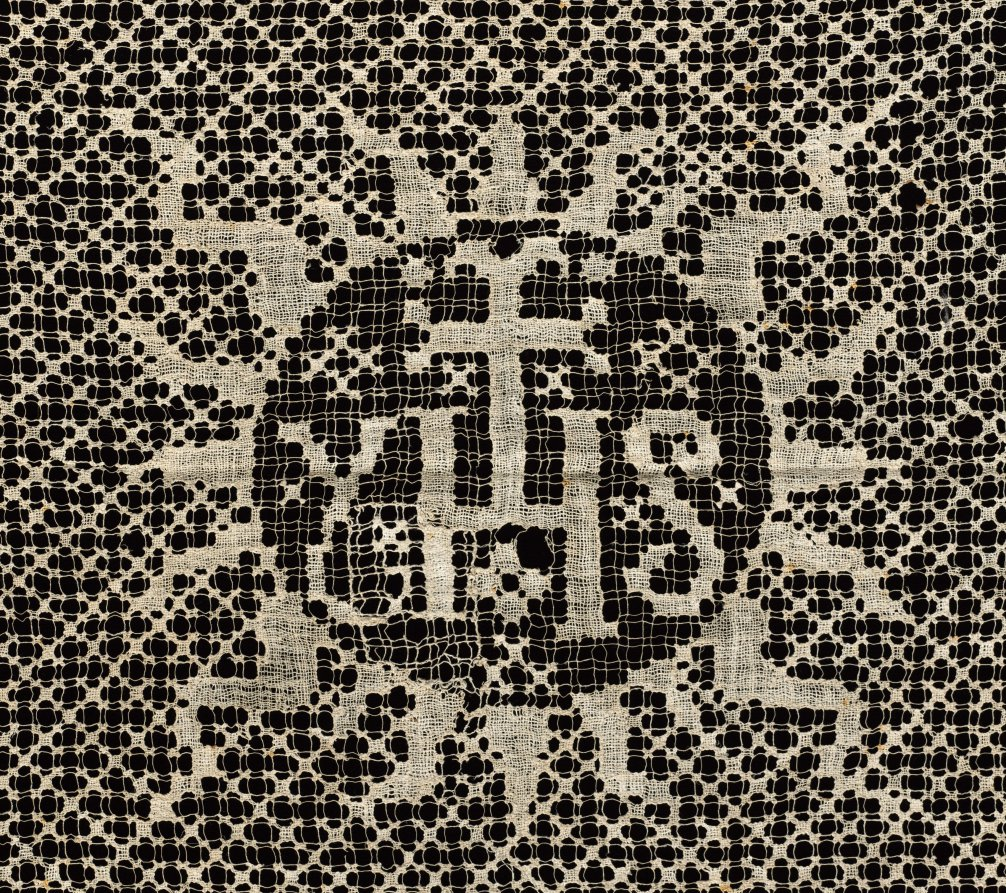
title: Chalice Veil with Monogram of Christ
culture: Italy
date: 1500s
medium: Bleached linen(?): needle lace (mezza mandolina) with red silk thread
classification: Lace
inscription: "I H S" in center.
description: This piece has been identified as a veil used to cover the chalice that holds the wine until the moment of communion in a Catholic Mass. The central monogram (IHS) abbreviates the name of Christ in Greek, surrounded by a circle of rays that indicate a holy symbol. The technique is of needle lace, knotted in an irregular pattern (mezza mandolina) and darned in two directions.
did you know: The monogram for Christ derives from the first three letters in his name in Greek – ΙΗΣΟΥΣ. The Greek letter Σ (sigma) is written as an “S” in English.